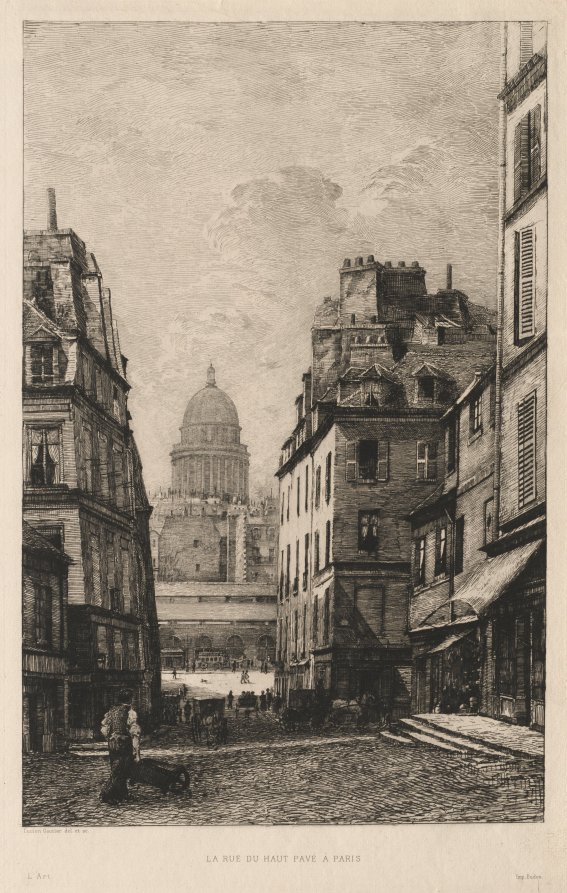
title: La rue du Haut Pavé à Paris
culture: France, 19th century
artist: Lucien Gautier (French, 1850–1925)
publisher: L'Art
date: 1881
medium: etching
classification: Print